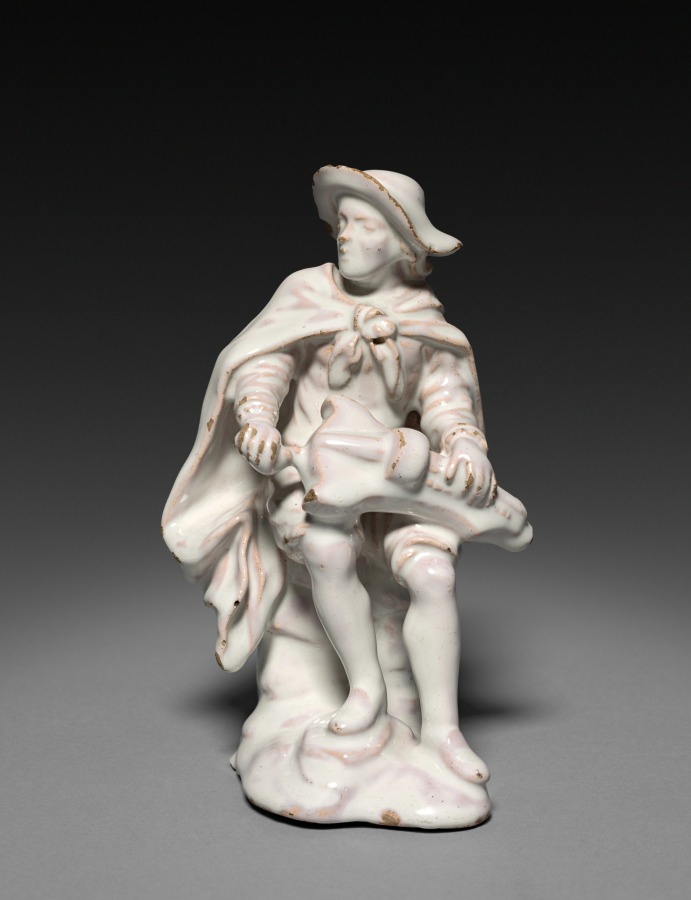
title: Seated Musician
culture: France, Strasbourg, 18th century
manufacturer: Strasbourg Factory (France)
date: c. 1740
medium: faience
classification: Ceramic